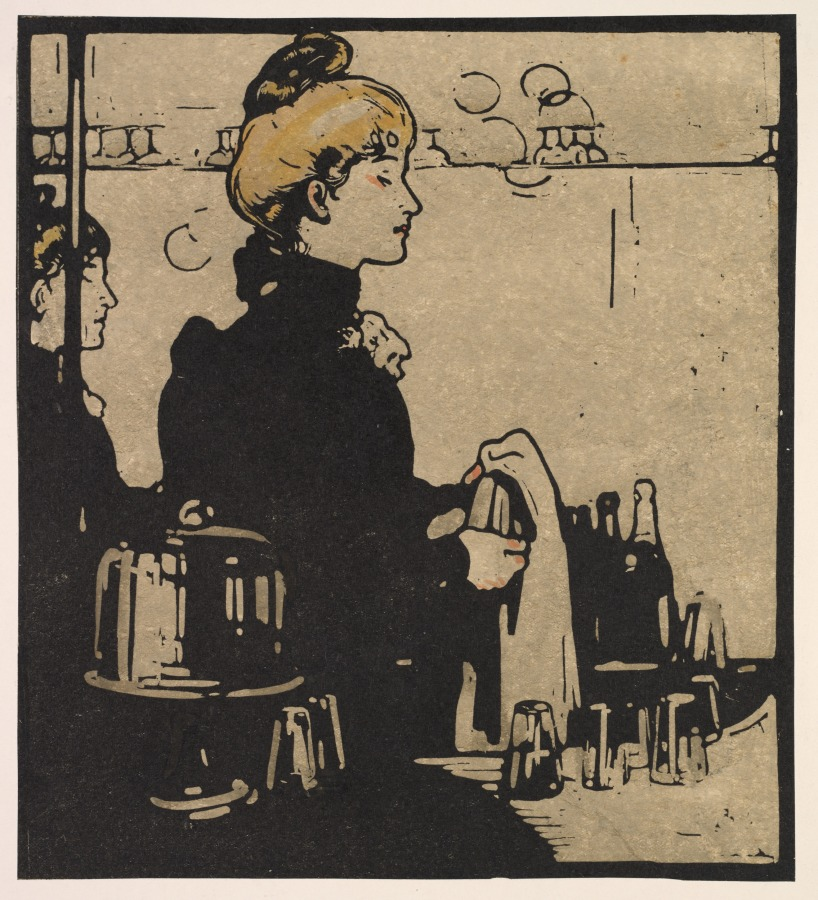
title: London Types: Barmaid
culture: England, 19th century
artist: William Nicholson (British, 1872–1949)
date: 1898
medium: woodcut hand-colored with watercolor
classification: Print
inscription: lower left margin, in black ink: William Nicholson - 1898 -